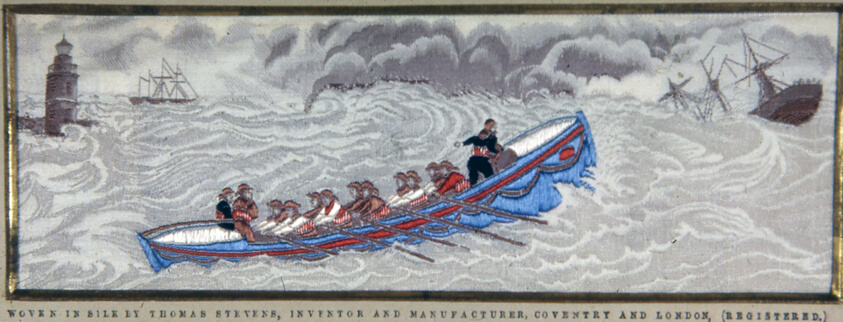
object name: Textile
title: "Called to The Rescue (Life Boat Scene)"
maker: Woven by Thomas Stevens (English, 1867-88); Coventry and London, England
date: 1875/1900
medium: Silk, plain weave with supplementary brocading wefts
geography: Coventry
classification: textile; weaving